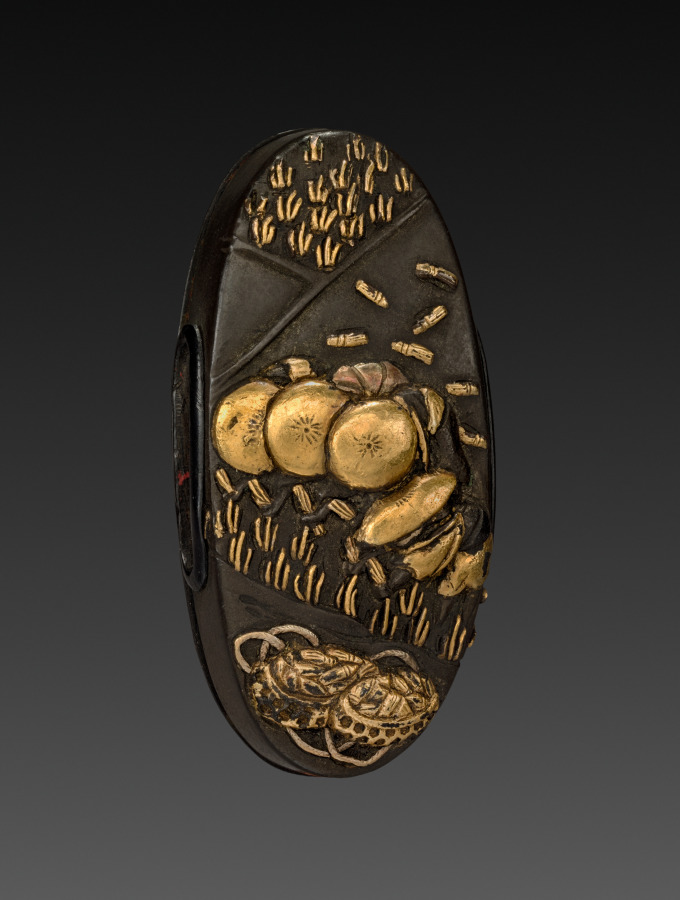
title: Sword-Hilt Pommel (Kashira) with Rice Cultivation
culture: Japan, Edo period (1615–1868)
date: 1700–1850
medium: shibuichi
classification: Arms and Armor